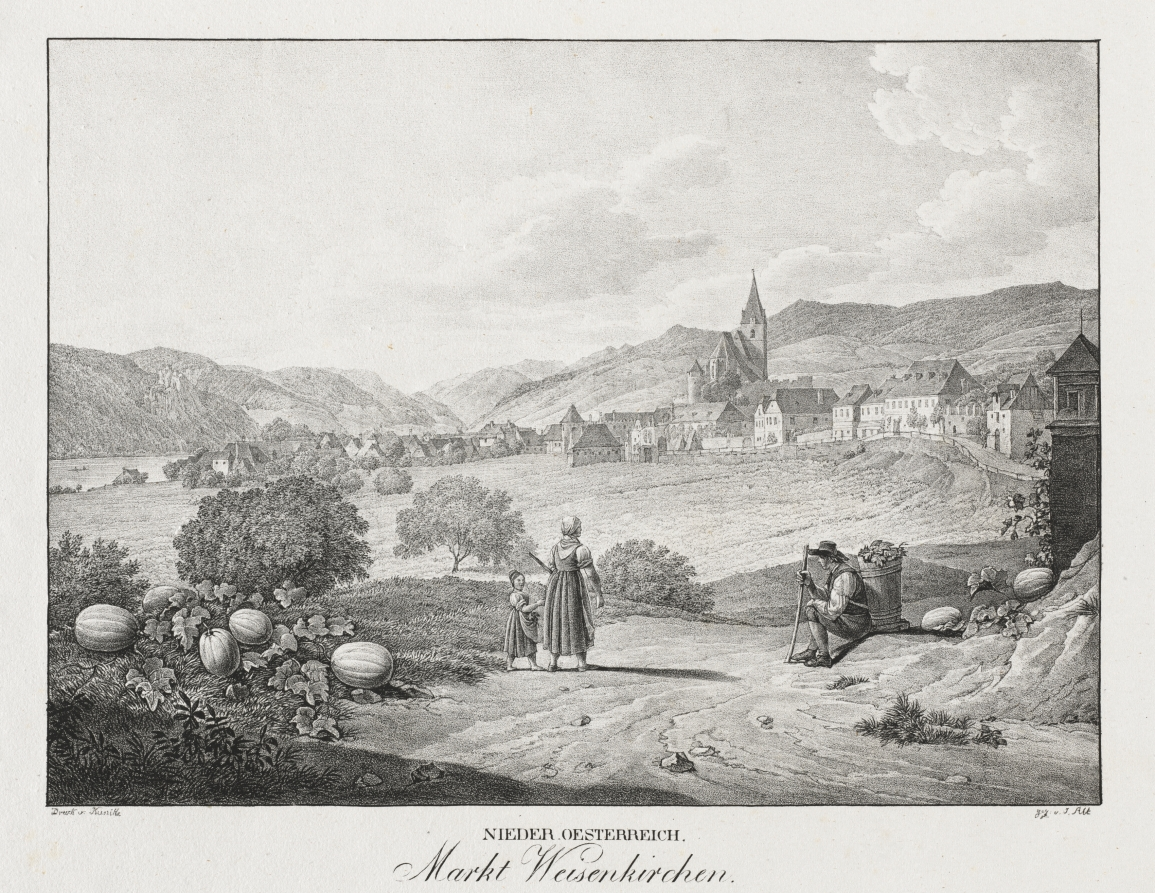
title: Nieder-oesterreich, Markt Weisenkirchen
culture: Austria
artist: Jakob Alt (Austrian, 1789–1872)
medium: lithograph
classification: Print